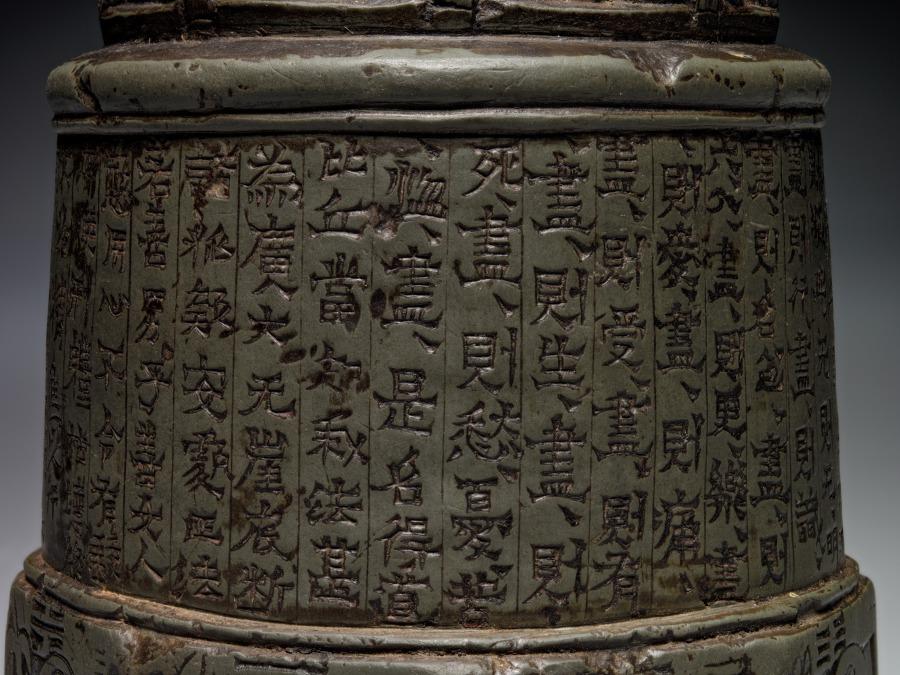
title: Miniature Votive Stupa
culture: China, Gansu province, Northern Wei dynasty (386-534)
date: 435 CE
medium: steatite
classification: Sculpture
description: This sutra pillar, inscribed with a sacred Buddhist text, belongs to a group of miniature stupas (jingta) that were found exclusively in the Gansu corridor, Northwest China. Ranging in date between AD 426–36, some of them bear the names of the lay Buddhist donors who commissioned them. A stupa is an architectural round structure built for the veneration of Buddhist relics. Miniature stupas may have commemorated the visit of a sacred site or represented donations to religious communities and sites.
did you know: There are trigrams, three horizontal lines, broken or continuous, above each of the eight bodhisattvas in the stupa's lower section.